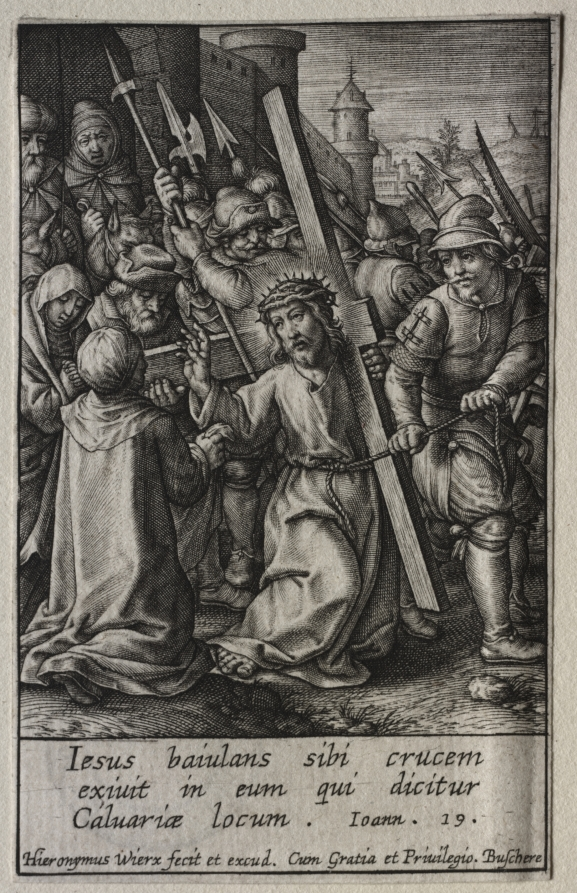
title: The Passion: Christ Carrying the Cross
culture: Flanders, late 16th-early 17th century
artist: Hieronymus Wierix (Flemish, 1553–1619)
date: before 1619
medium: engraving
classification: Print